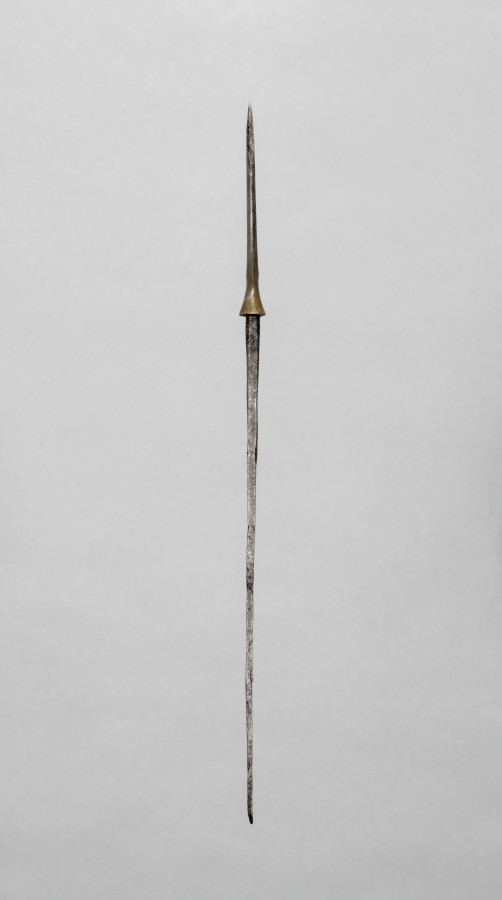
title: Arrow Point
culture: Japan, Edo period (1615–1868)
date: 1700s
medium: steel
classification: Arms and Armor